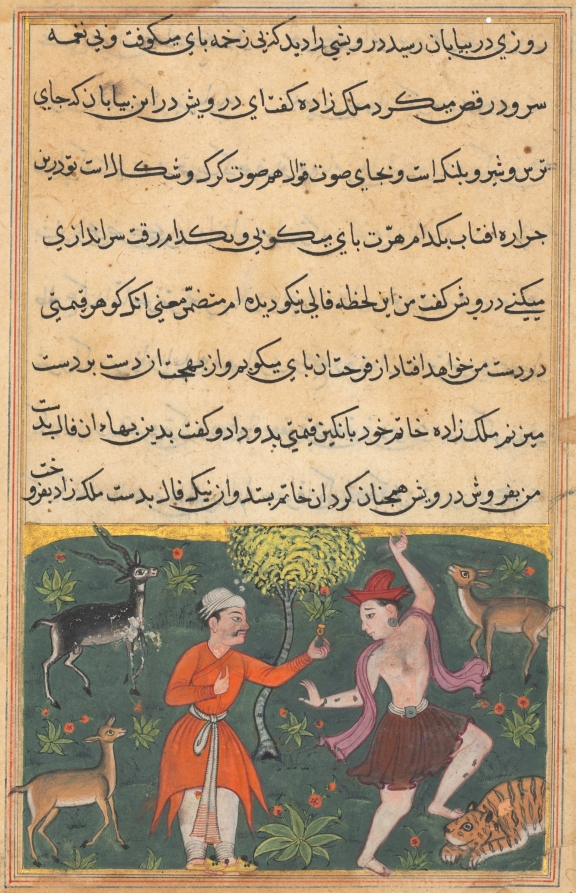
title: The prince meets a carefree dancing dervish whose good fortune he purchases for his ring, from a Tuti-nama (Tales of a Parrot): Eighteenth Night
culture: Mughal India, court of Akbar (reigned 1556–1605)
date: c. 1560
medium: gum tempera, ink, and gold on paper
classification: Painting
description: The prince, in the orange tunic, had been exiled by his older brother who inherited the throne, so he decided to travel the country. In a wilderness he met a dancing dervish to whom wild animals seemed mystically drawn; the deer are unconcerned about the tiger nearby. Dervishes are Sufi holy men whose dances bring them closer to god, but in this ironic story, the dervish dances for joy, because he just perceived an omen that he was about to become rich. The prince handed him his signet ring in exchange for the dervish’s good fortune.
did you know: The animals in the wilderness include a tiger, two does, and a blackbuck.